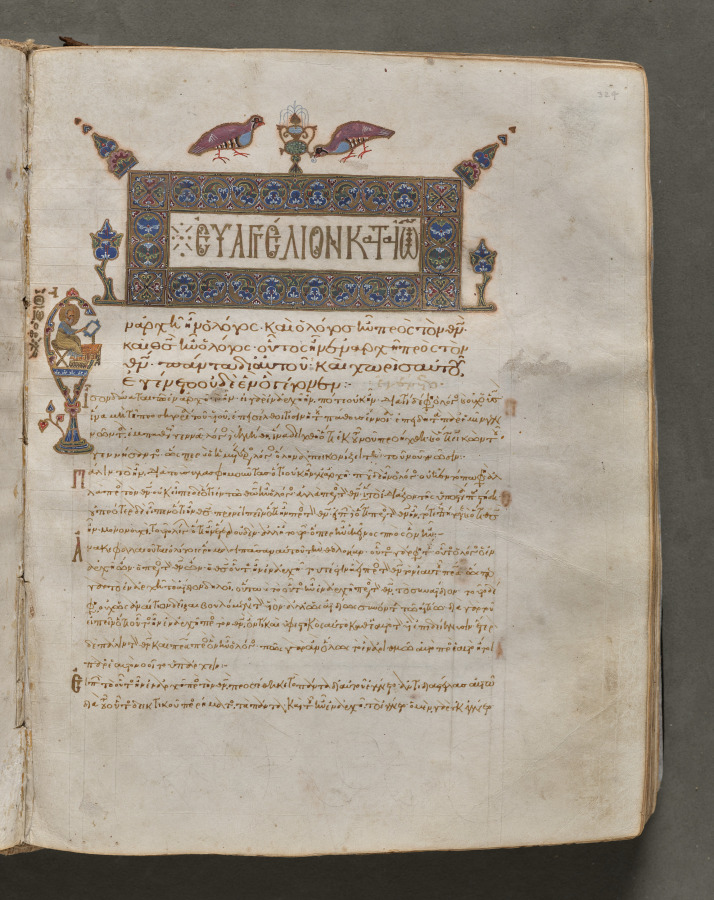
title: Portrait of John, folio 324 (recto), from a Gospel Book with Commentaries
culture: Byzantium, Constantinople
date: c. 1000–1100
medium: ink, tempera, and gold on vellum; leather binding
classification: Bound Volume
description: Each of the four gospels in this book opens on a page with brilliantly illuminated borders depicting the author of the text as well as birds-principally peacocks, symbols of the immortality of the soul-and fountains, representing the fountain of life and the salvation of the soul. This volume consists of 428 leaves with texts in Greek. Its level of sophistication suggests that it was probably written and decorated in a monastery in Constantinople.